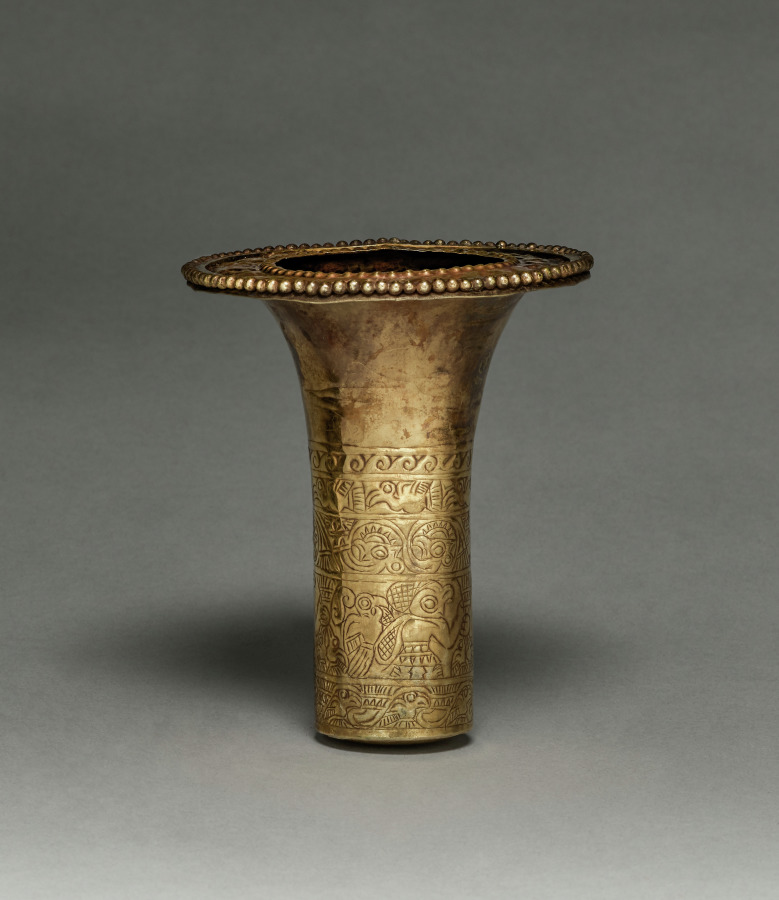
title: Ear Flare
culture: Peru, North Coast, Chimú style (900-1470)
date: 900–1470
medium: hammered gold alloy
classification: Metalwork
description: North Coast ear ornaments typically have a long shaft that balanced the weight of the glorious frontal. This pair illustrates Chimú interest in the sea, which had great economic and religious importance. On the shafts are bands of seabirds and waves, and a similar pattern edges the frontals, which were altered in modern times. Originally solid disks, the frontals' centers were cut out and a dotted band was added to the rim.